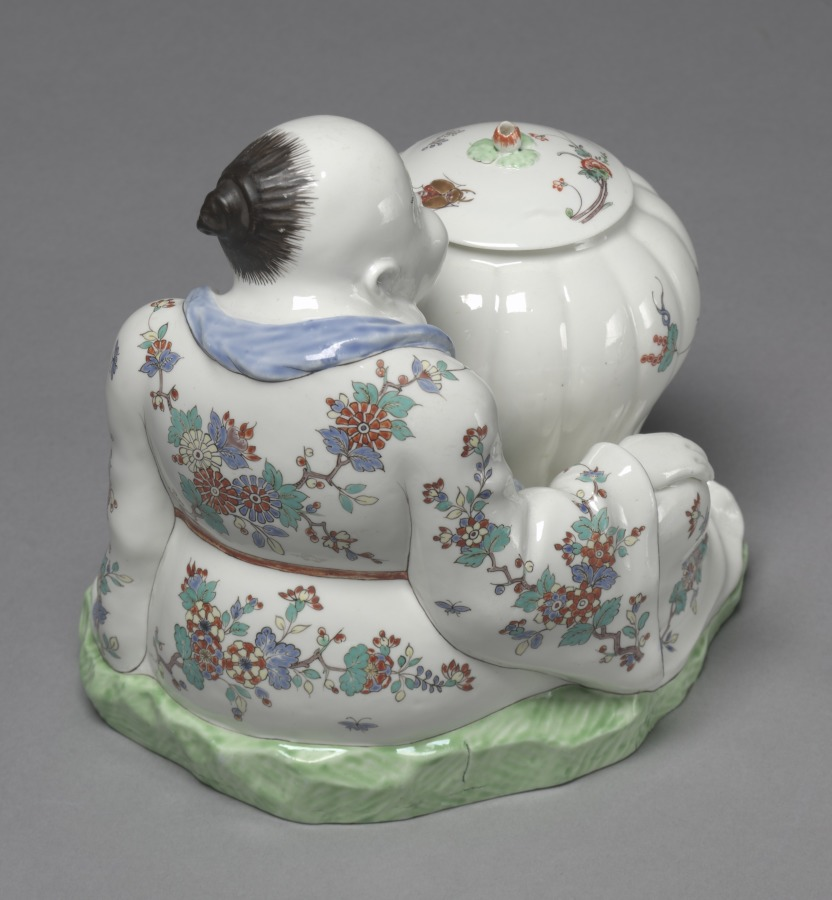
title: Figure of Budai or Hotei with Jar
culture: France, Chantilly, 18th century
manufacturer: Chantilly Porcelain Factory (French)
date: c. 1735–40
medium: Tin-glazed soft-paste porcelain with enamel decoration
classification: Ceramic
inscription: [Mark of the Chantilly factory (red hunting horn), on bottom]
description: The production of decorative figures like this one, referred to as magots or pagodes in European texts, was the result of an 18th-century European interest in Chinese and Japanese culture and porcelain. Budai, pronounced Hotei in Japanese, was a semilegendary Chinese monk known in Japan through the transmission of Chan Bhuddism. This figure’s decoration with multicolor overglaze enamels on a milky-white is typical of Japanese Kakiemon style.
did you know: In 1735, the Chantilly factory was given a 25-year royal privilege for the manufacture of objects that imitated Japanese porcelain.